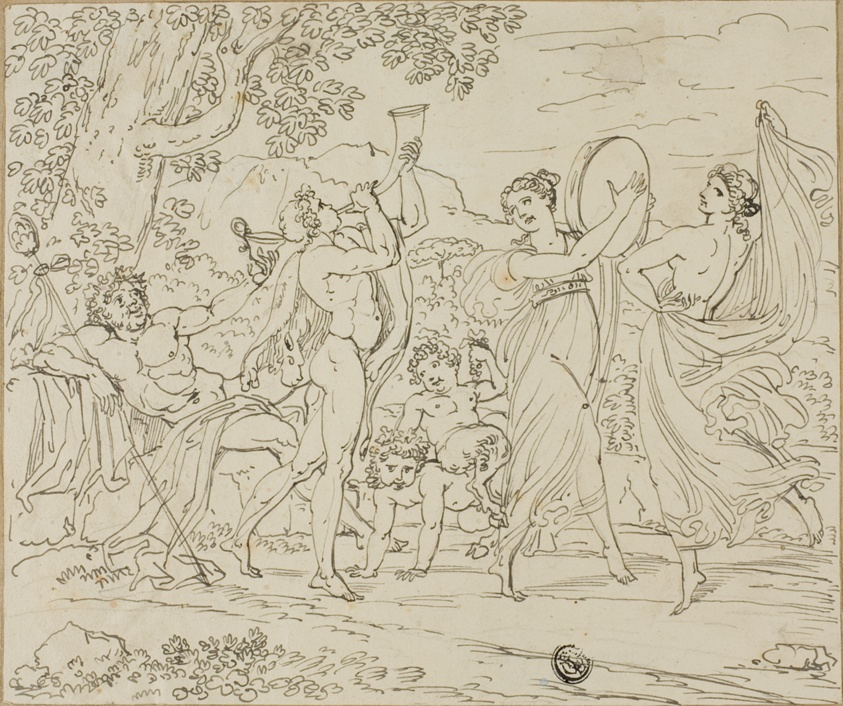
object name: Drawing and Watercolor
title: Bacchanale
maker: Unknown Artist; French or Italian, 1800-1899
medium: Pen and black ink, on cream wove paper, tipped on tan wove paper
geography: France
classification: pen and ink drawings; drawings (visual works); prints and drawing